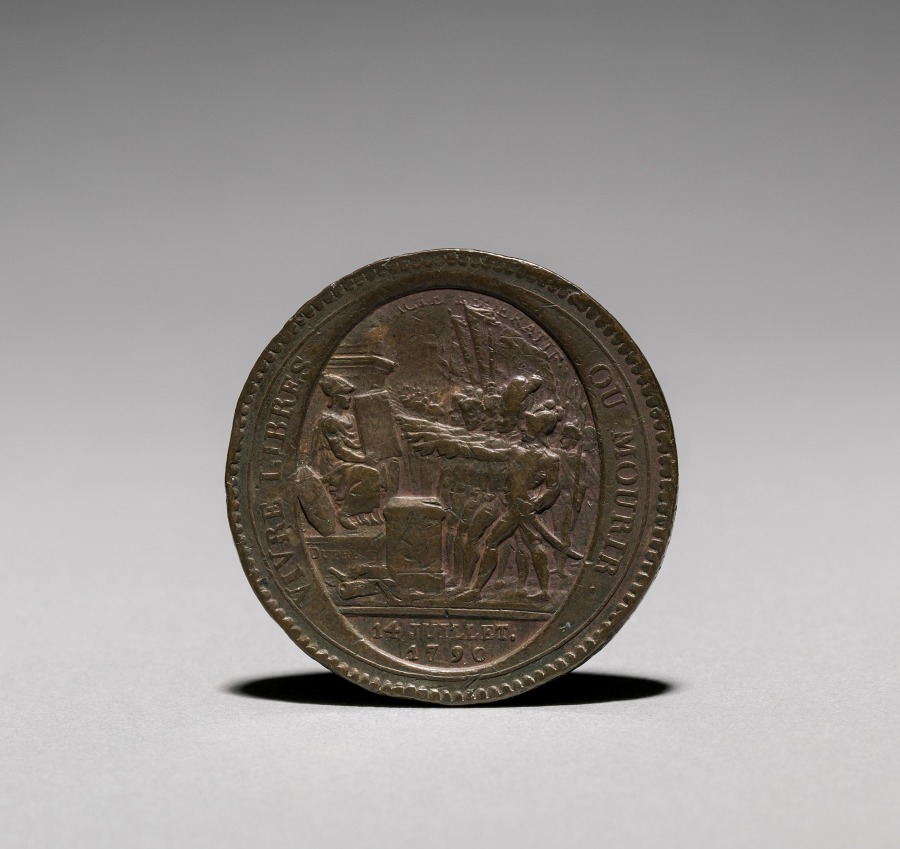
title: Medal: Five Sols issued by Monneron Brothers, Paris, 1792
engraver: Augustin Dupré (French, 1748-1833)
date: 1792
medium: bronze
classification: Metalwork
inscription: Monneron Freres Negociano. A. Paris 1792. Medalle de confiance de cinq. Sols remecursable en assignats ge 50 et audesses l'an IV dela liperte.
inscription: VIVRE LIBRES OU MOURIR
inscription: PACTE FEDERATIE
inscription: 14 JUILLET 1790